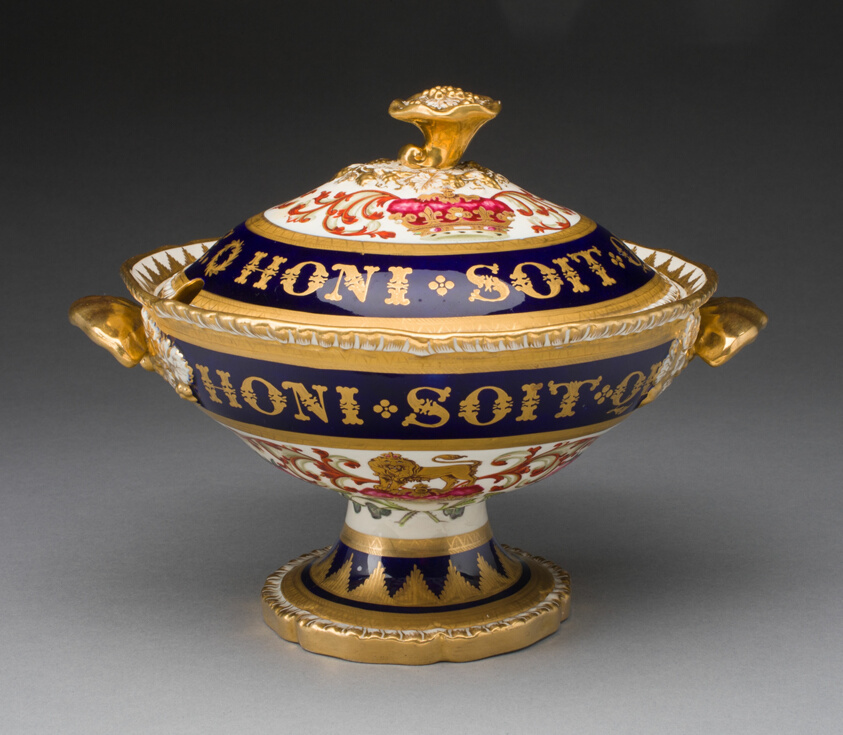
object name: Ceramics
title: Covered Cream Bowl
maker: Henry & Richard Daniel; English, 1822-46; Retailed by Mortlock China Co.; English, 1746-1896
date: c. 1820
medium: Soft-paste porcelain, polychrome enamels and gilding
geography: London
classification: vessel for serving food; tableware; dish (vessel); porcelain; european decorative arts; ceramics